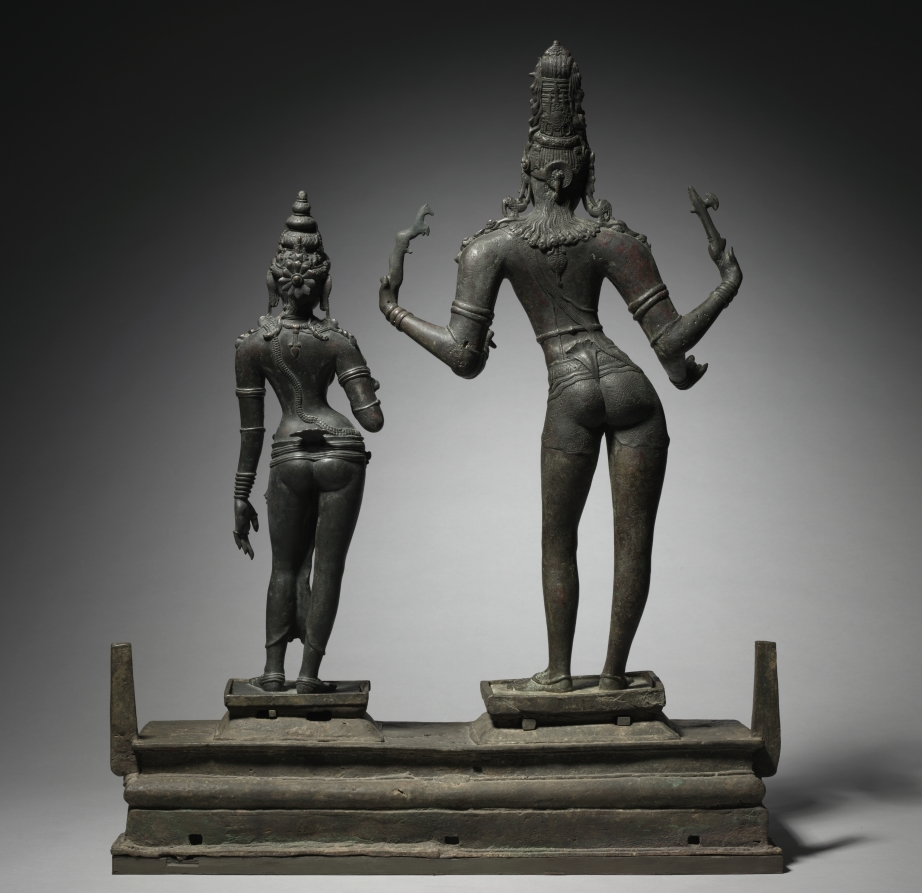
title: Shiva and Parvati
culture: South India, Tamil Nadu, Chola period (900–1200s))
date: c. 950–60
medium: bronze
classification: Sculpture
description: Bronze sculptures made during the Chola period (800s–1200s) are among the most celebrated and popular art forms of the Indian tradition, and the 10th century marks their flourishing peak. The sensual renditions of attenuated, youthful, and athletic forms are barely covered by garments and ornaments that move, yet cling to the bodies. The figures stand with a natural ease, and the volumes have been so skillfully rendered by the artists that they appear to be capable of walking the earth. Their serene and smiling expressions are completely idealized, leaving no mistake that these are gods, not humans.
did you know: The posts on the sides of the pedestal once supported a halo that surrounded both figures.